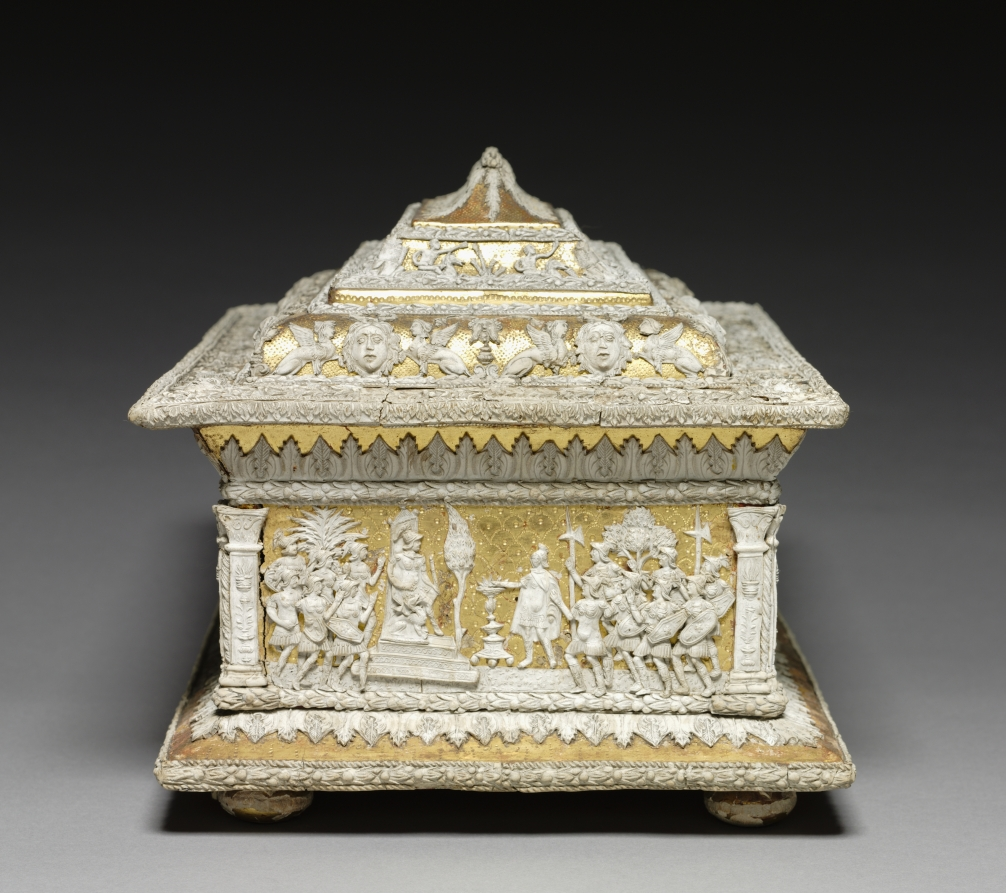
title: Box with Military Scenes from Antiquity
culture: Workshop of the Cleveland Casket (Italy), 16th century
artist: Workshop of the Cleveland Casket (Italian)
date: c. 1520–1530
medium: pastiglia on gilded wood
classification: Furniture and woodwork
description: This box features four military scenes from antiquity: an allegiance, a triumph, a battle, and an execution.